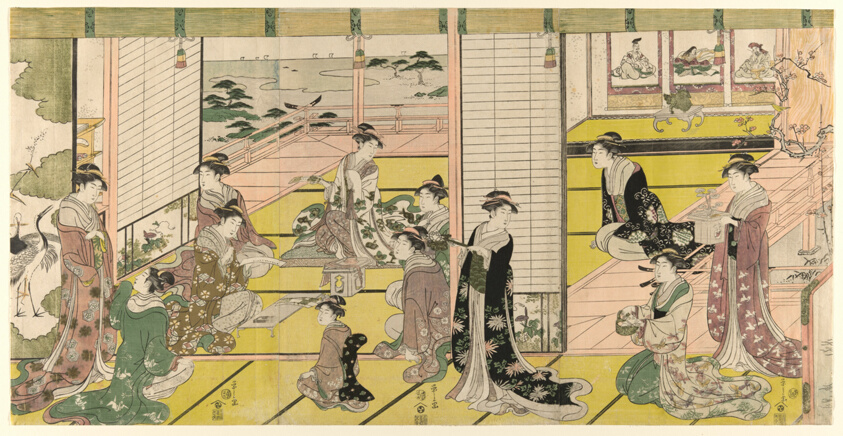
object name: Print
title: A Woman's Poetry Party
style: Japanese (culture or style)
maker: Chobunsai Eishi; Japanese, 1756-1829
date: c. 1793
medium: Color woodblock print; oban triptych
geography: Japan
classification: woodblock print; print; asian art